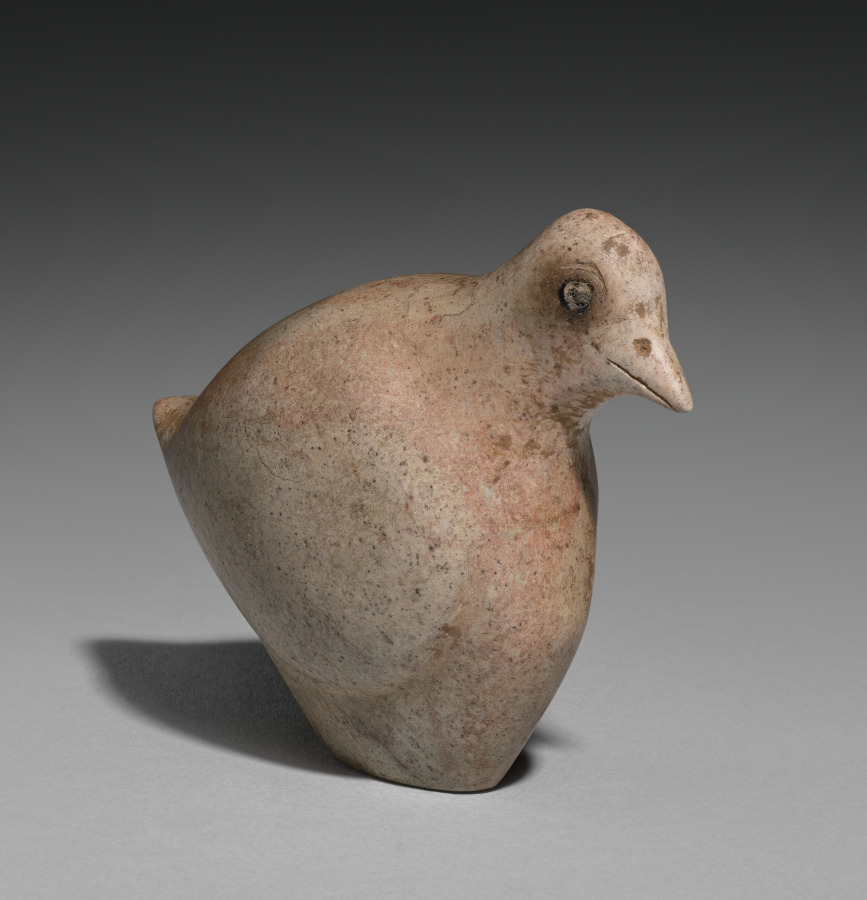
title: Nesting Quail Stamp Seal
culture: Iran, Lake Van region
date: 4000–3000 BCE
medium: dickite stone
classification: Sculpture